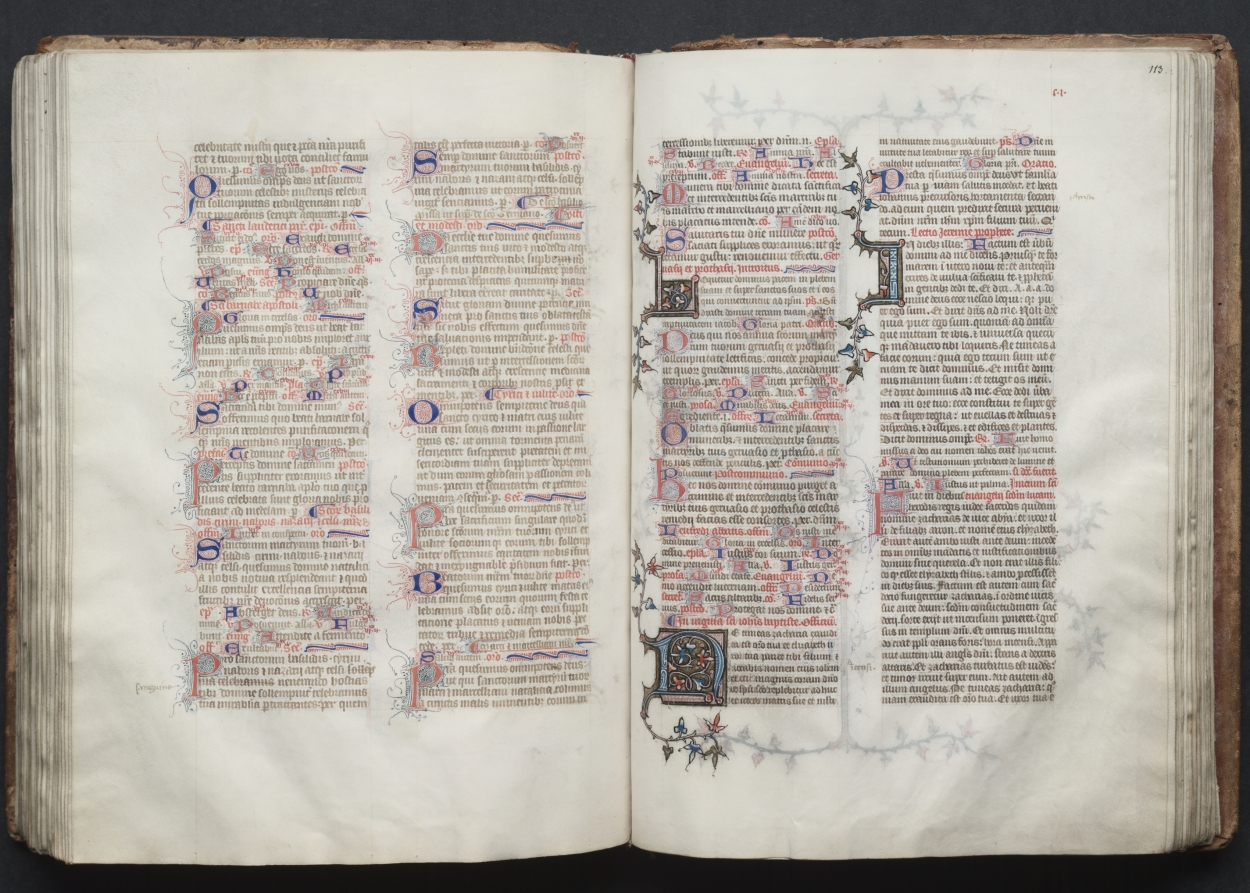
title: The Gotha Missal: Fol. 113r, Text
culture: France, Paris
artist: Master of the Boqueteaux (French)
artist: and Workshop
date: c. 1375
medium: ink, tempera, and gold on vellum; blind-tooled leather binding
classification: Bound Volume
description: The style and quality of this manuscript's decoration is typical of deluxe Parisian books made for aristocratic or royal patrons. Most of the book's decoration appears to be the work of the Master of the Boqueteaux, an artist active at the court of King Charles V (died 1380). His style was apparently shared by a number of book illuminators working in and around Paris. It is very possible that the Gotha Missal belonged to Charles V, but is not provable because the manuscript has no royal portraits and lacks a colophon. Given the book's magnificent decoration, however, it would seem that it was produced for a Valois prince, if not for the king himself. The manuscript receives its name from the German dukes of Gotha, its later owners.